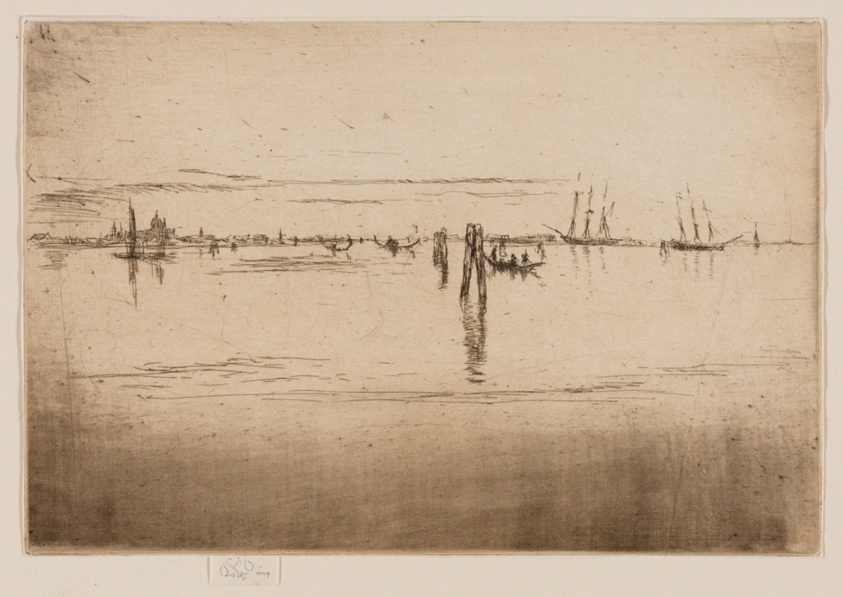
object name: Print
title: Long Lagoon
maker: James McNeill Whistler (American, 1834-1903)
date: 1879/80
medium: Etching and drypoint with foul biting in black ink on off-white laid paper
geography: United States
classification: etching; drypoint; foul biting; print; prints and drawing; paper